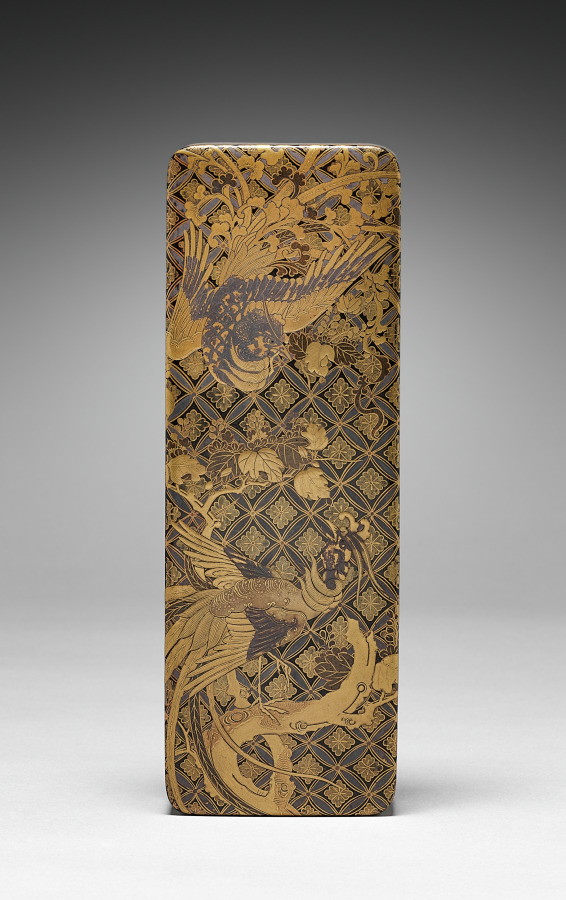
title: Letter Box (lid)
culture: Japan, Edo period (1615–1868)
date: 1615–1868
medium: lacquer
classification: Lacquer